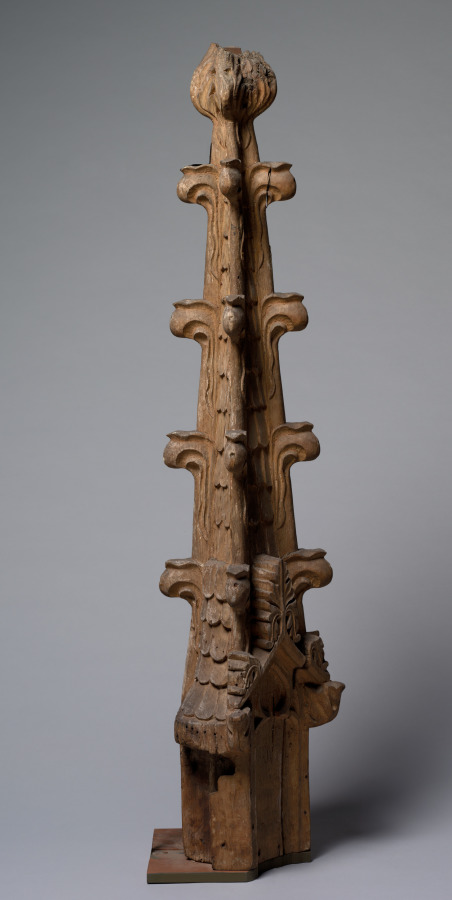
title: Pinnacle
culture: France, 15th century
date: 1400s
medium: oak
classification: Furniture and woodwork